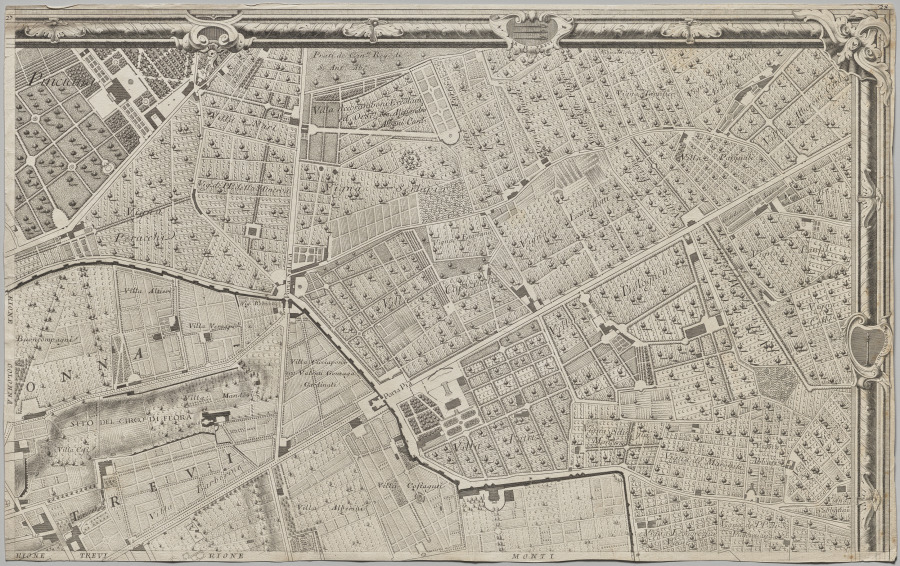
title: Nuova pianta di Roma data in luce da Giambattista Nolli l’anno MDCCXLVII, known as La Pianta Grande di Roma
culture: Italy, 18th century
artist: Giovanni Battista Nolli (Italian, 1701–1756)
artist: Carlo Nolli (Italian, 1690–1790)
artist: Rocco Pozzi (Italian, 1701–1774)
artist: Pietro Campana de Soriano (Italian, 1725–c. 1779)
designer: Stefano Pozzi (Italian, 1699–1768)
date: 1748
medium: etching and engraving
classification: Print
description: The monumental Pianta Grande di Roma, or Large Plan of Rome, which measures about 5 x 7 feet when its twelve plates are assembled, is a landmark in both cartography and printmaking. The map is considered the first scientific rendering of Rome, establishing new standards of accuracy and thoroughness when it was published in 1748. Devised by the Lombard architect and surveyor Giovanni Battista Nolli (Italian, 1701-56), the creation of the map required over ten years of surveying the city carried out by Nolli and a team of assistants with the help of new measuring devices. In Nolli’s “ichnographic” (also called “ground”) plan, architectural features and the urban infrastructure are reduced to a single horizontal slice, a minutely detailed footprint that conveys dimensions, proportions, and orientations to scale with the utmost clarity.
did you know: To make this map, Pope Clement XII granted the mapmaker permission to measure courtyards and other interior, inaccessible spaces in monastic communities, even those in nuns’ convents, which was controversial at the time.